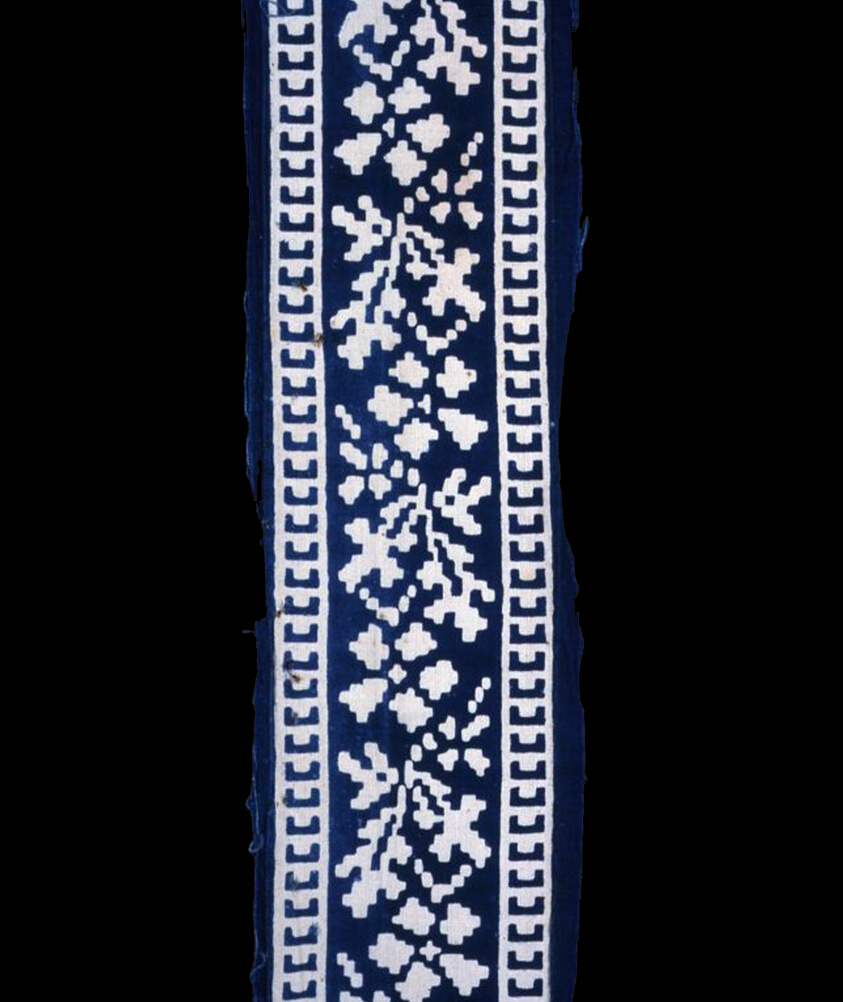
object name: Textile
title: Border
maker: England or United States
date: 19th century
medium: Cotton, plain weave; block printed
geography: England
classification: textile; weaving - printed